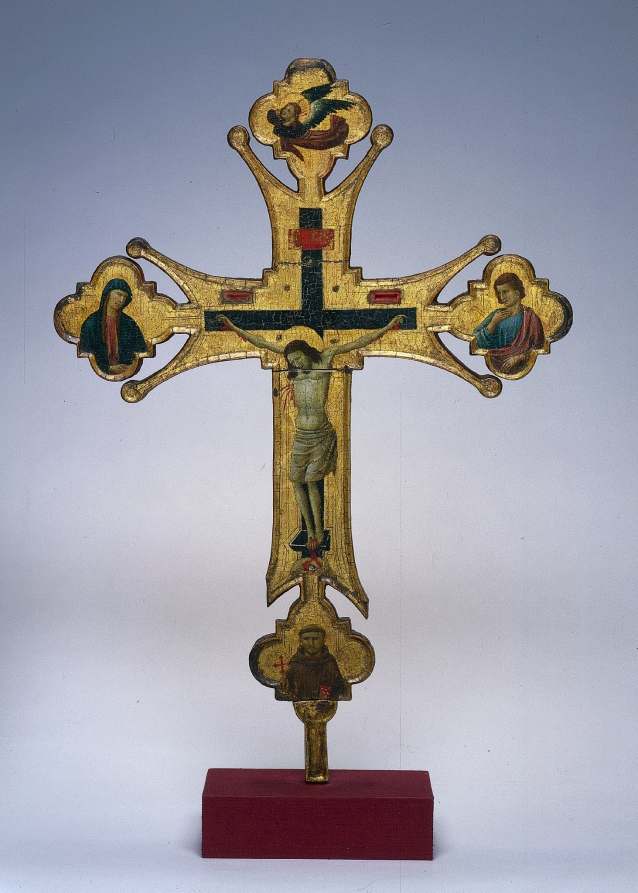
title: Processional Cross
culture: Italy, Umbria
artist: Master of Santa Chiara (Italian)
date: c. 1320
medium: oil on canvas on wood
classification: Painting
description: This cross was originally mounted on a tall pole and carried in religious processions. Therefore, the figures on each side are almost identical. In the center is Christ crucified. Looking on from the elaborate terminals at left and right are the Virgin and Saint John. The bottom terminal shows a different saint on each side: Saint Francis on one and Saint Clare on the other. At the top of each side is an angel. Although one angel looks up and the other down, both express intense grief in their faces and gestures. The Master of Santa Chiara is the name given to this unknown artist who painted this and several other works in Assisi. In that city, Saint Francis founded an order of friars while Saint Clare established a counterpart for women called the Poor Clares. The presence of both saints on this cross suggests that it was made for one of Assisi's Franciscian institutions.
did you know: This cross is painted on both sides so that while being carried in a procession the images are visible to a crowd; both sides are not quite identical.